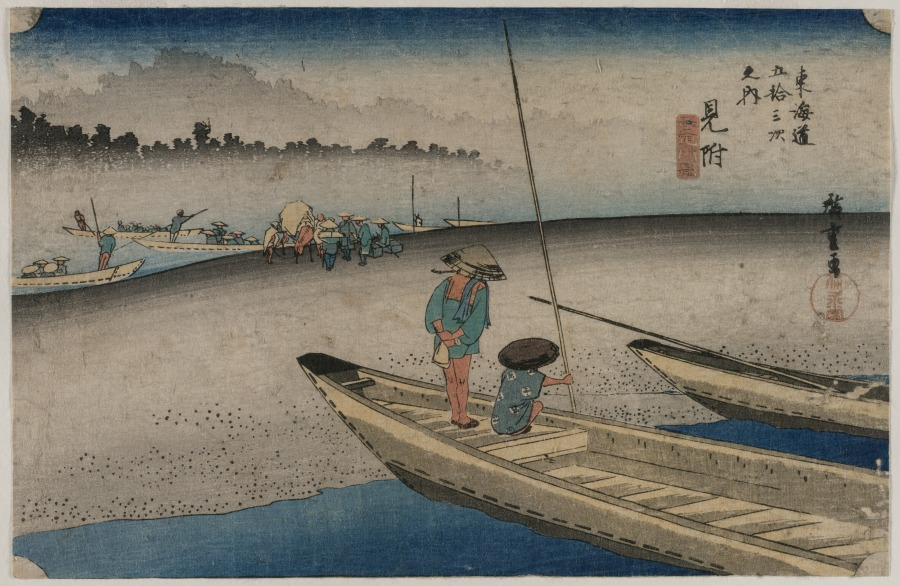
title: Picture of the Tenryu River near Mitsuke (Station 29), from the series Fifty-Three Stations of the Tokaido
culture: Japan, Edo period (1615–1868)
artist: Utagawa Hiroshige (Japanese, 1797–1858)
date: 1833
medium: color woodblock print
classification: Print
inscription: Signature: Hiroshige ga Publisher: Takenouchi Magohachi (Hoeido)